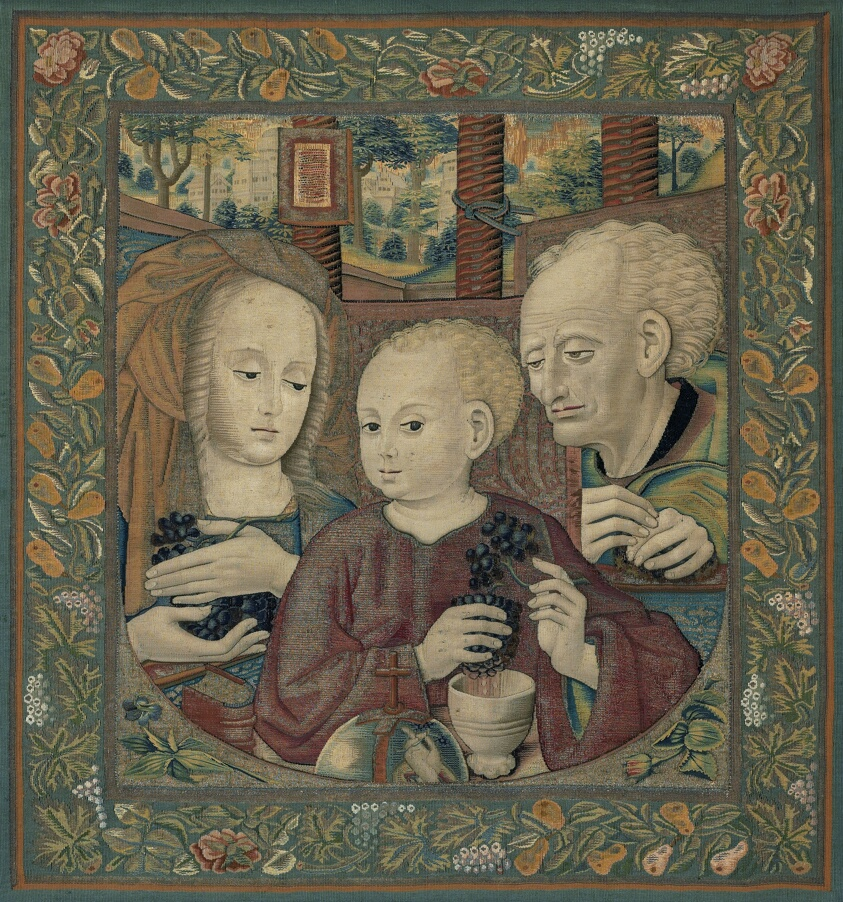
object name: Coverings and Hangings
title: The Holy Family with the Infant Christ Pressing the Wine of the Eucharist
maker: Southern Netherlands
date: 1485/1525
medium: Linen, wool, silk, and gilt-metal-strip-wrapped silk; slit tapestry weave. Warp: Count: 10 warps per cm; linen: S-ply of two Z-spun elements; diameters: 0.4–0.5 mm. Weft: Count: varies from 28 to 64 wefts per cm; wool: single Z-spun elements; S-ply of two Z-spun elements; pairs of S-ply of two Z-spun elements; diameters; 0.25–0.65 mm; silk: four elements possibly with a slight S- or slight Z-twist; three Z-twisted elements; S-ply of two Z-twisted elements; pairs of S-ply of two Z-twisted elements; three yarns of S-ply of two Z- twisted elements; Z-ply of two S-twisted elements; four yarns, two of S-ply of two Z-twisted elements and two of Z-ply of two S-twisted elements; two to four yarns of Z-ply of two and three S-twisted elements; diameters: 0.2–0.65 mm; wool and silk: paired yarns of S-ply of two Z-spun wool elements and S-ply of two Z-twisted silk elements; paired yarns of S-ply of two Z-twisted silk elements and Z-spun wool clement; diameters; 0.3–0.6 mm; gilt-metal-strip-wrapped silk: gilt-metal strips wrapped in an S-direction on an S-twisted silk element; S-ply of two yarns: each a Z-ply of two S-twisted yarns of gilt-metal strips wrapped in an S-direction on a Z-twisted silk element; diameters: 0.3–0.65 mm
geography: Belgium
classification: weaving - tapestry; textile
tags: holy family, columns, cup, eucharist, flowers, foliage, grapes, Jesus, Joseph, people, portraits, wine